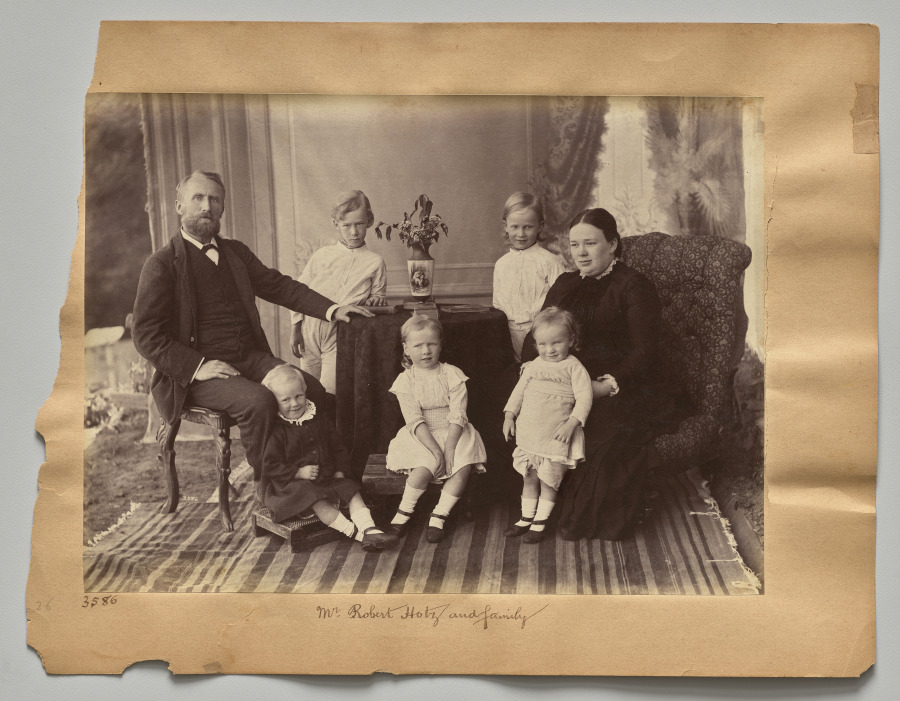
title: Mr. Robert Holtz and family (verso)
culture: India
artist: Raja Deen Dayal (Indian, 1844–1905)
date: c. 1882–87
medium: albumen print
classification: Photograph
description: These photographs are part of an album, now disassembled, of around 105 photographs taken in India between 1885 and summer 1887 that provide glimpses into the lives of the British colonial elite and royal and upper-class Indians. The museum holds another group of 37 pictures from this album (2016.266), which was probably commissioned by a British civil servant visiting or working in India around 1888 as a personal souvenir of his experiences there.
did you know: Raja Deen Dayal is regarded now, and was considered during his lifetime, to be India’s most important 19th-century photographer.